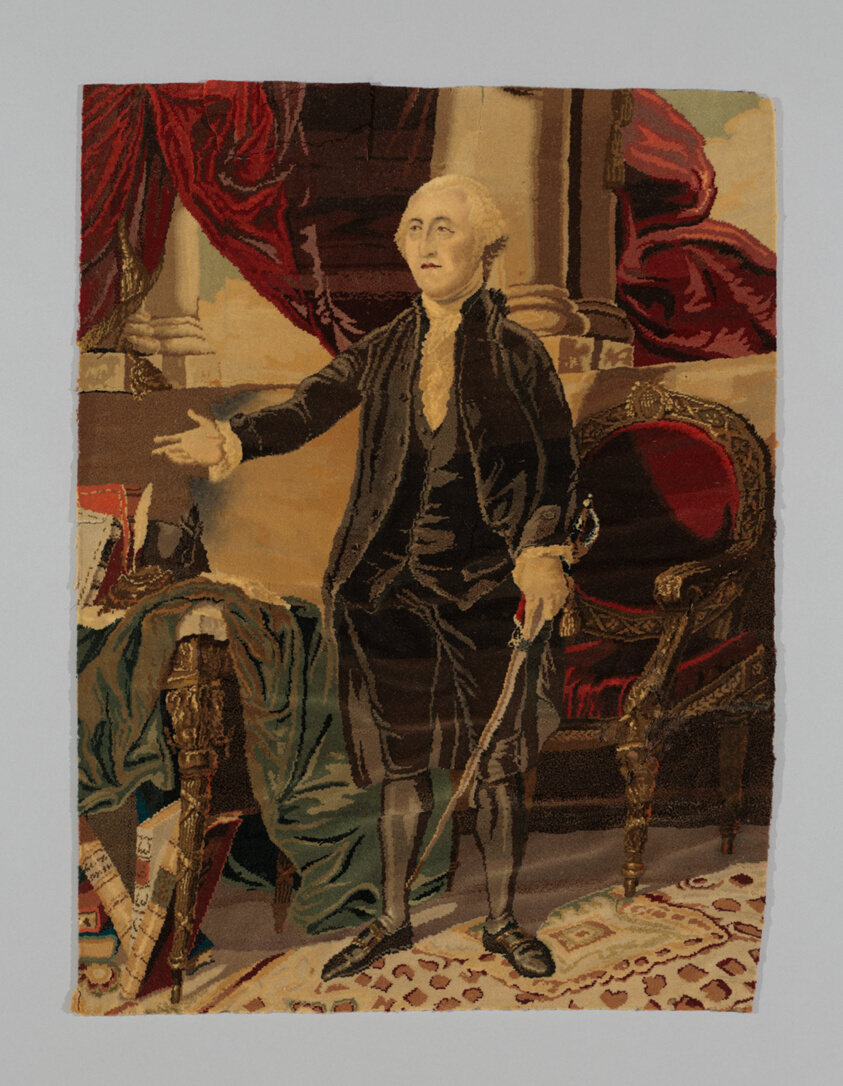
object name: Textile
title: Portrait of George Washington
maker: Produced by John Crossley & Sons, Ltd.; England, Halifax, West Yorkshire, Dean Clough Mills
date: c. 1860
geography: England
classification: textile; weaving